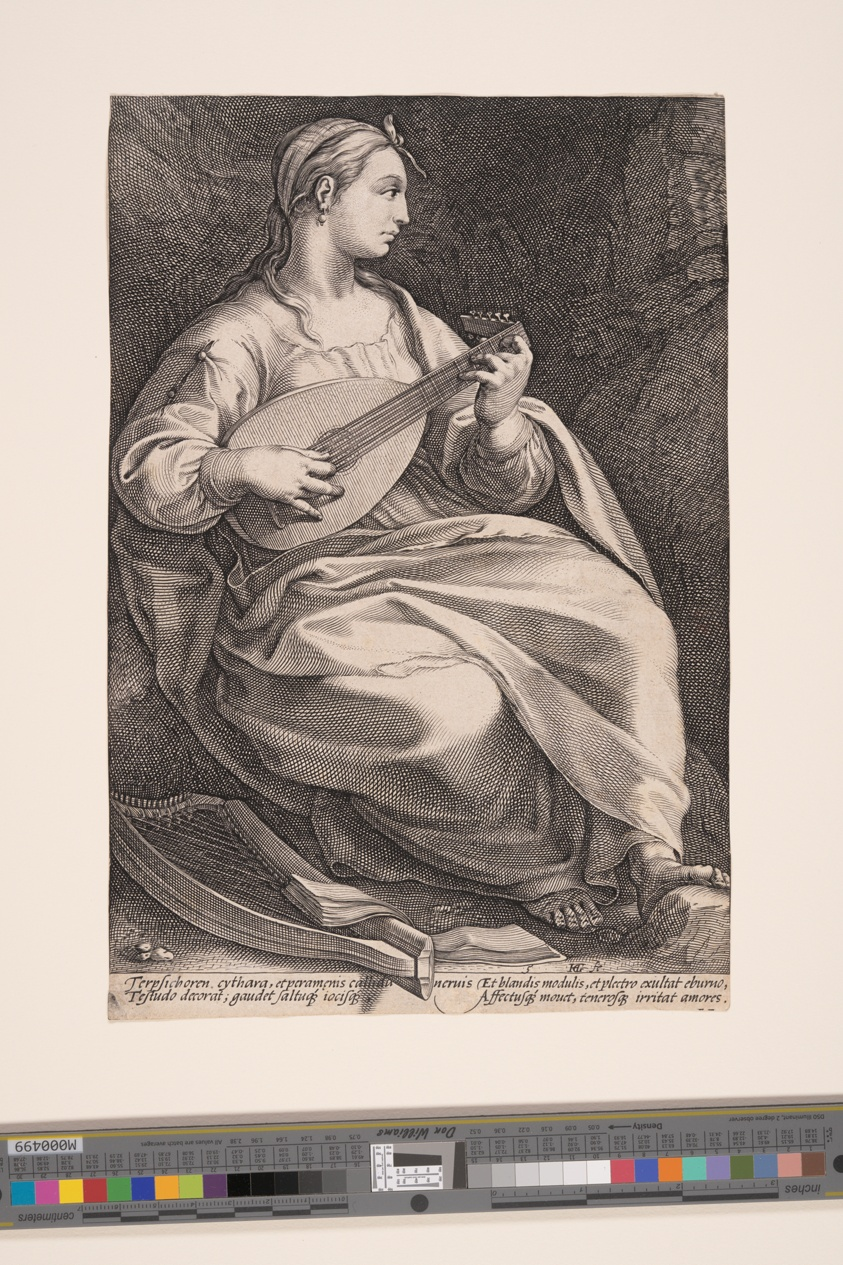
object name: Print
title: Terpsichore, The Muse of Dance, from The Nine Muses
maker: Hendrick Goltzius (Dutch, 1558–1617)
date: 1592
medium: Engraving on laid paper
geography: Netherlands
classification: print; engraving; paper; prints and drawing